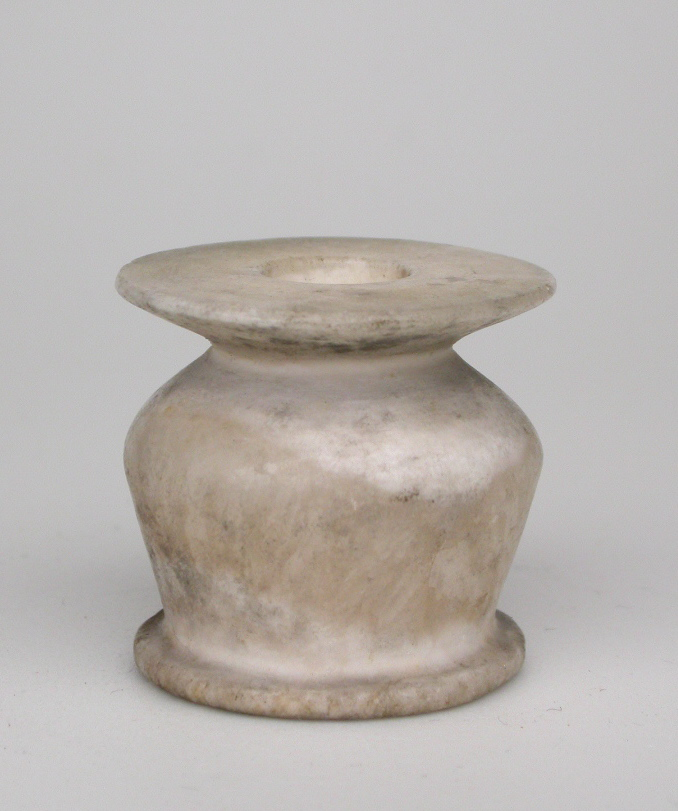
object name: Vessel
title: Kohl Jar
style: eighteenth dynasty, new kingdom, egyptian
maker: Egyptian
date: New Kingdom, Dynasty 18 (about 1550–1295 BCE)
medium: Travertine (Egyptian alabaster)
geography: Egypt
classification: personal grooming / hygiene / cosmetic container; container; vessel; ancient art